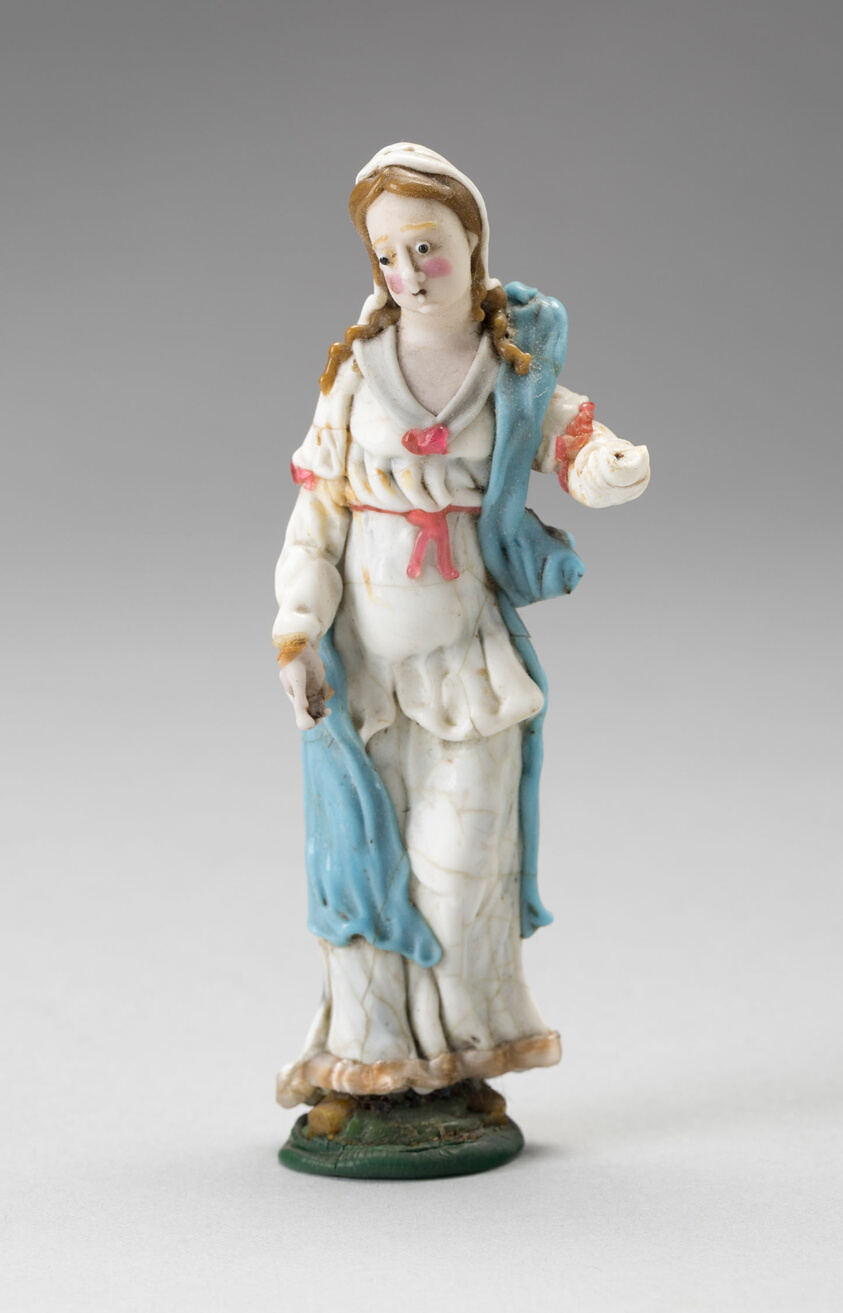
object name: Glass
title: Young Woman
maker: Nevers, France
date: 18th century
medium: Glass; lampwork (verre de Nevers), metal armature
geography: France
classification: glass; miniature; decorative object/ornament; european decorative arts